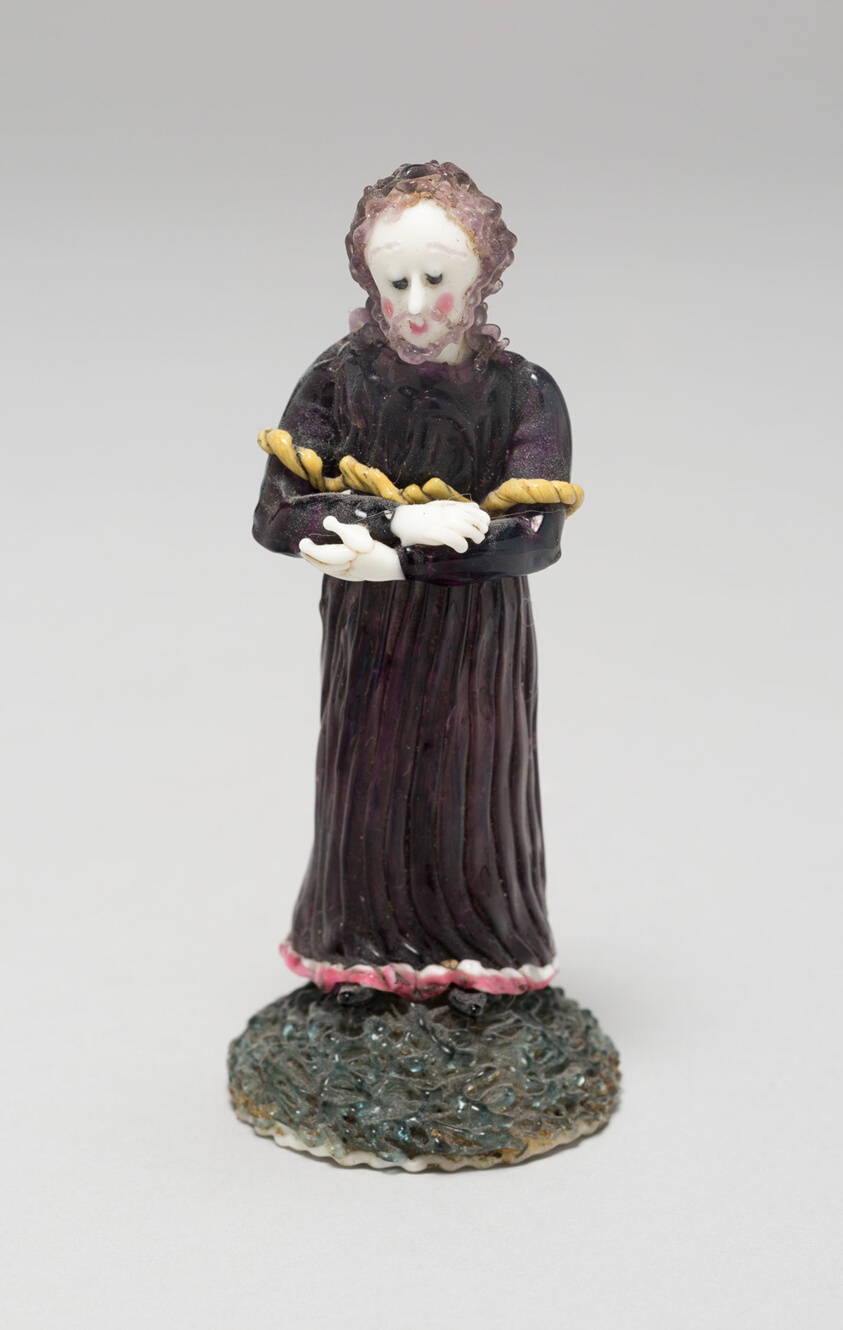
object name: Glass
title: Man with Arms Crossed in Front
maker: Nevers, France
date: 1700/50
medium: Glass; lampwork (verre de Nevers), metal armature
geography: France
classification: glass; miniature; decorative object/ornament; european decorative arts